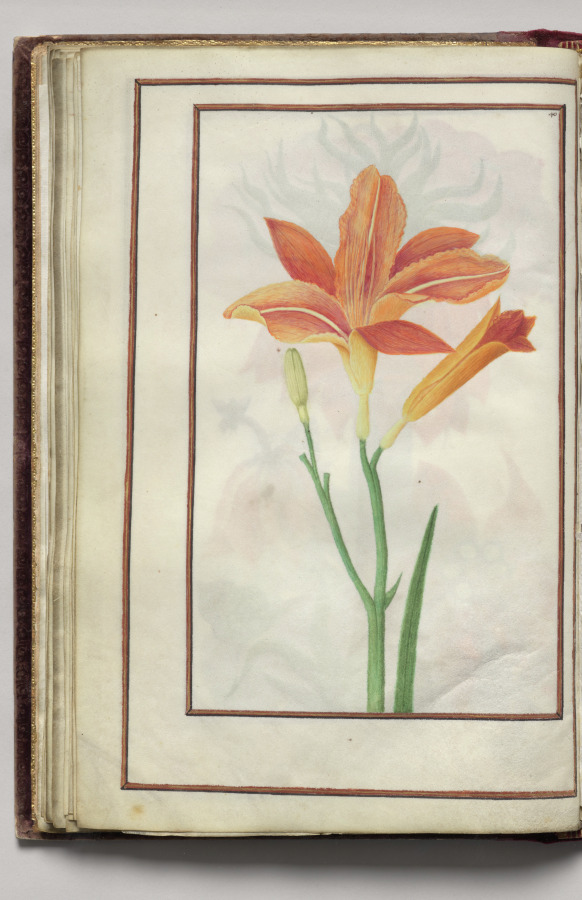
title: Day Lily, folio 20 (verso), from Florilegium (A Book of Flower Studies)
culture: France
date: 1608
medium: watercolor, ink, silver, and gold over occasional traces of pencil, on vellum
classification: Bound Volume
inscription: Dated: Poitiers 1608 (on frontispiece) Signed: On frontispiece in black ink, lower right: Van Kuyk Notation on drawing: Frontispiece: in pencil, lower margin: * élève de Van Kessel, peintre flammand (* in pencil also appears in front of Van Kuyk's name).